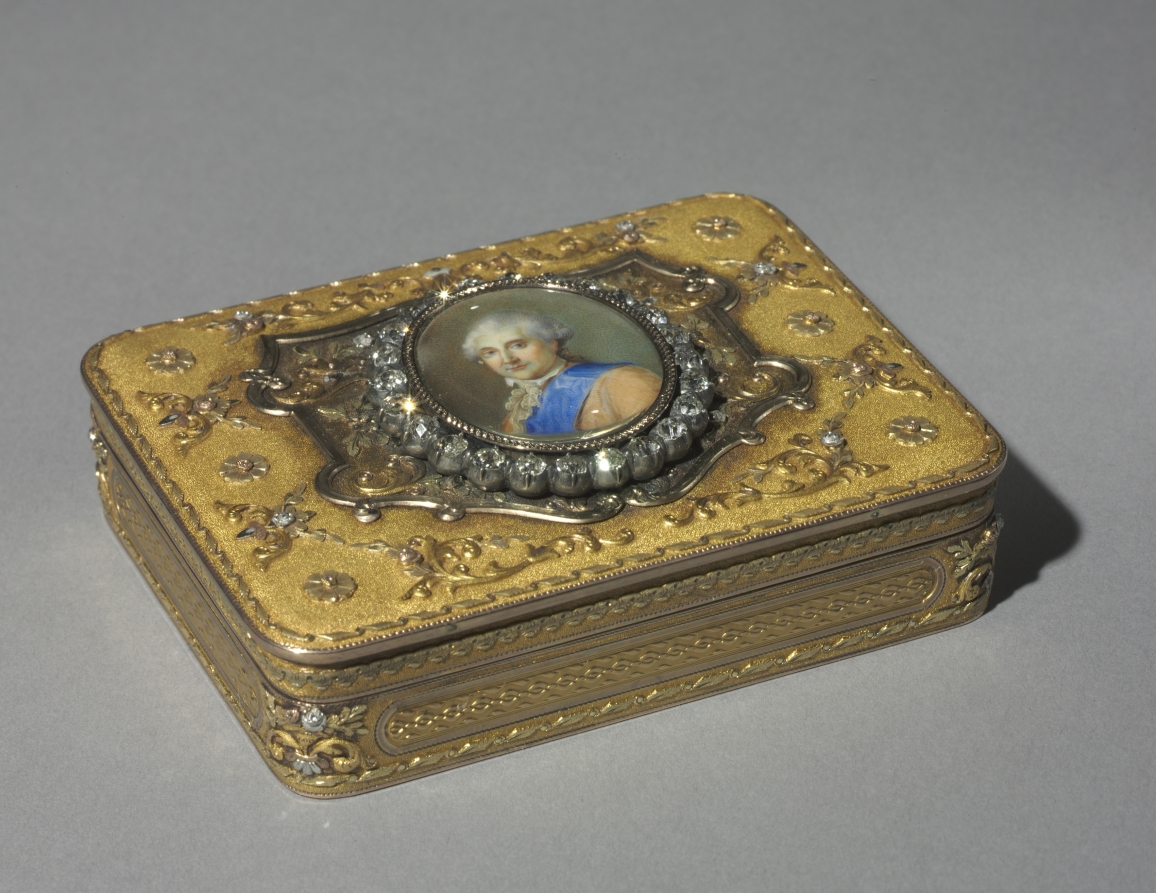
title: Portrait of a Man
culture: Switzerland, Neufchatel, mid-19th century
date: mid 1800s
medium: watercolor on ivory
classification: Miscellaneous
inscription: signed: "B."